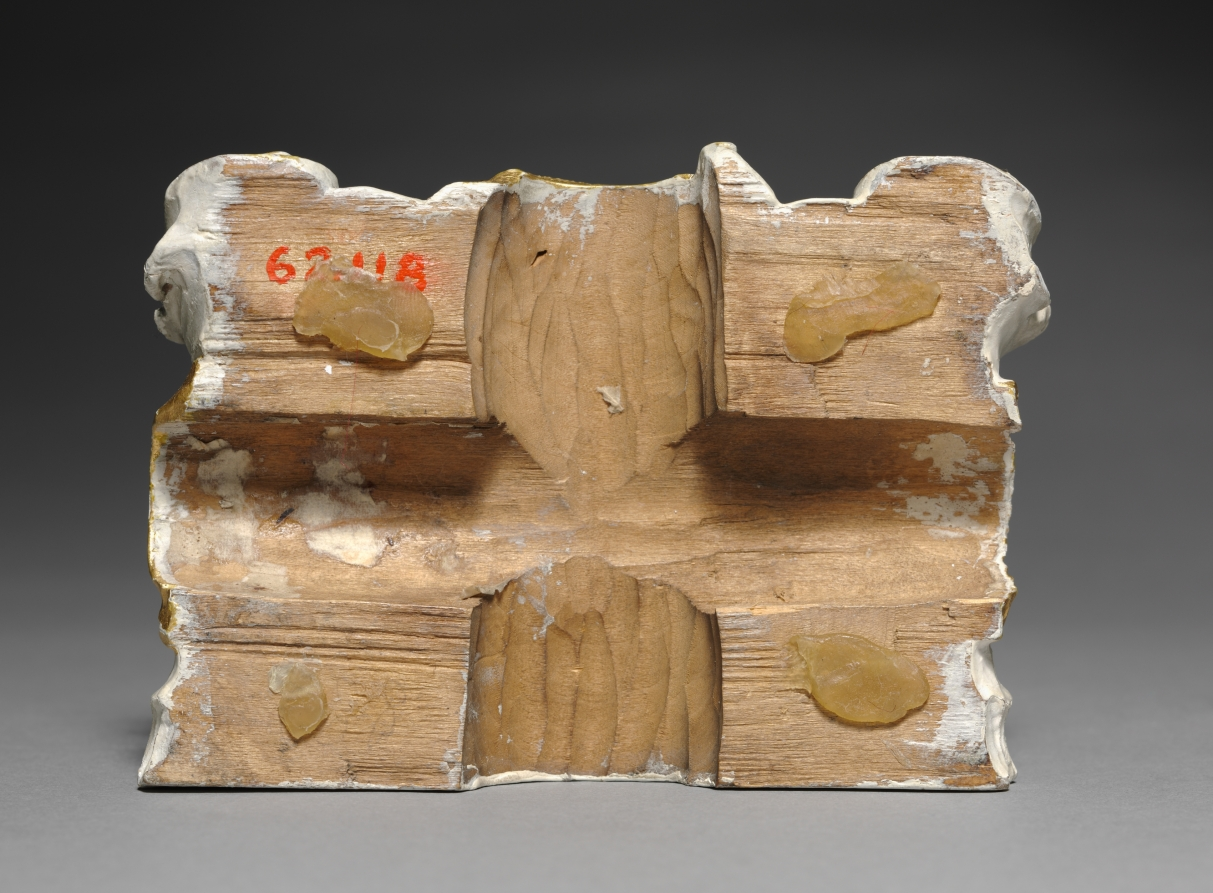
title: Bishop Saint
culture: Germany, 18th century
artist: attributed to Ferdinand Tietz (Austrian, 1708–1777)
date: c. 1740–1750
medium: painted and gilded wood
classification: Sculpture